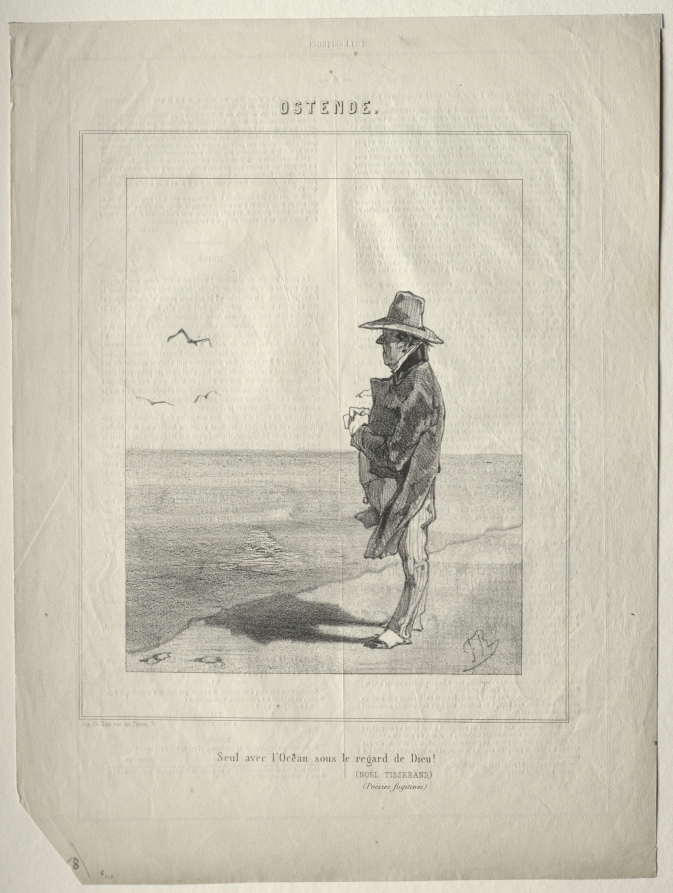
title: Ostend (Seul avec l'ocean sous le regard de Dieu!)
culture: Belgium, 19th century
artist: Félicien Rops (Belgian, 1833–1898)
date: c. 1856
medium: lithograph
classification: Print